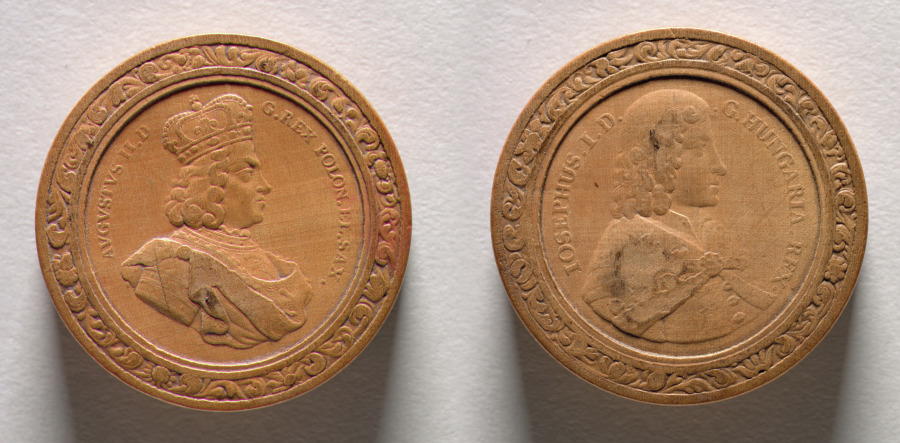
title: Gaming Piece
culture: Germany, late 17th-early 18th Century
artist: Martin Brunner (German, 1659–1725)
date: c.1700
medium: wood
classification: Furniture and woodwork